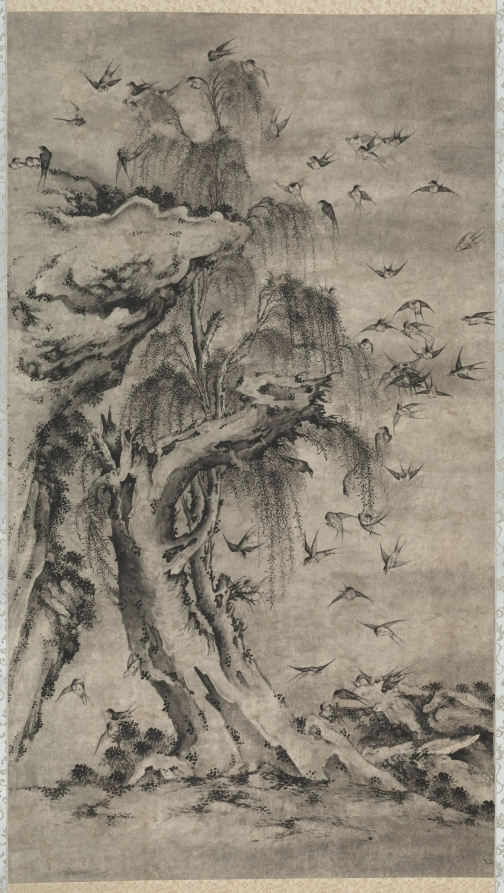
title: One Hundred Birds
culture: Japan, Edo period (1615–1868)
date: possibly 1600s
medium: hanging scroll; ink and slight color on paper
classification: Painting